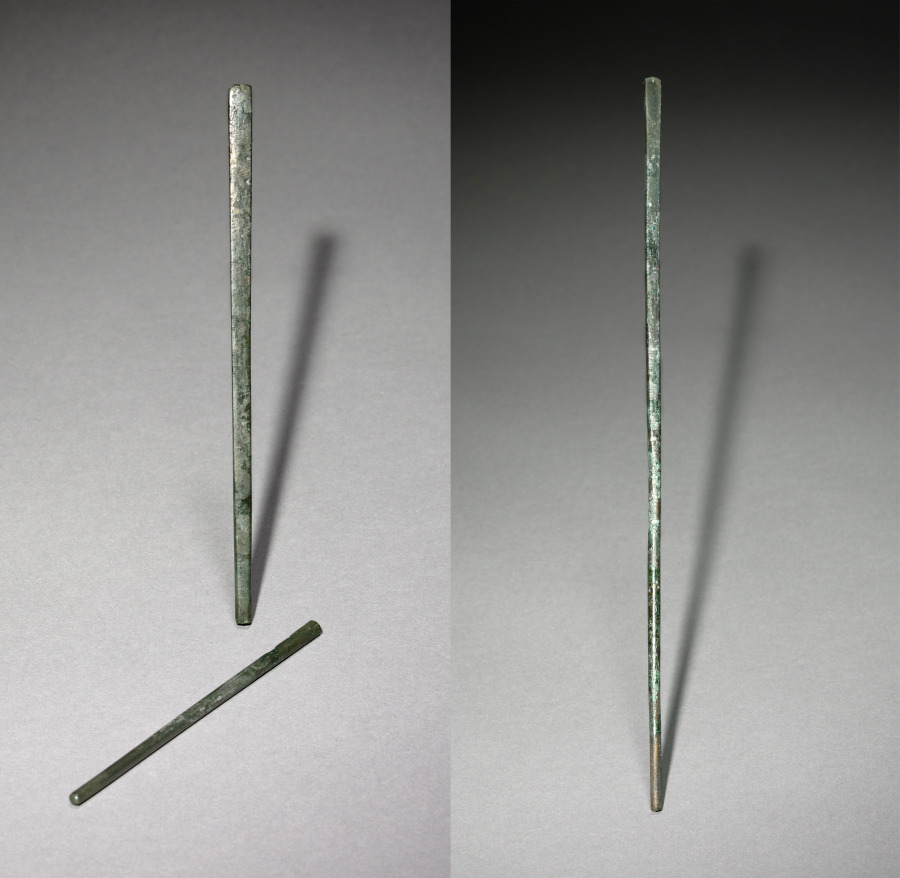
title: Chopstick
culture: Korea, Goryeo dynasty (918–1392)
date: 918–1392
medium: bronze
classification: Metalwork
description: In Korea, chopsticks made of metal such as brass, silver, and gold were excavated from ancient tombs and ruins dated to the 6th century at the earliest. Burial goods often include utilitarian objects such as table wares and utensils because the dead were believed to need them in the afterlife.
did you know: In contrast to the Chinese and Japanese, Koreans still prefer metal chopsticks (stainless steel and brass) to wooden ones.